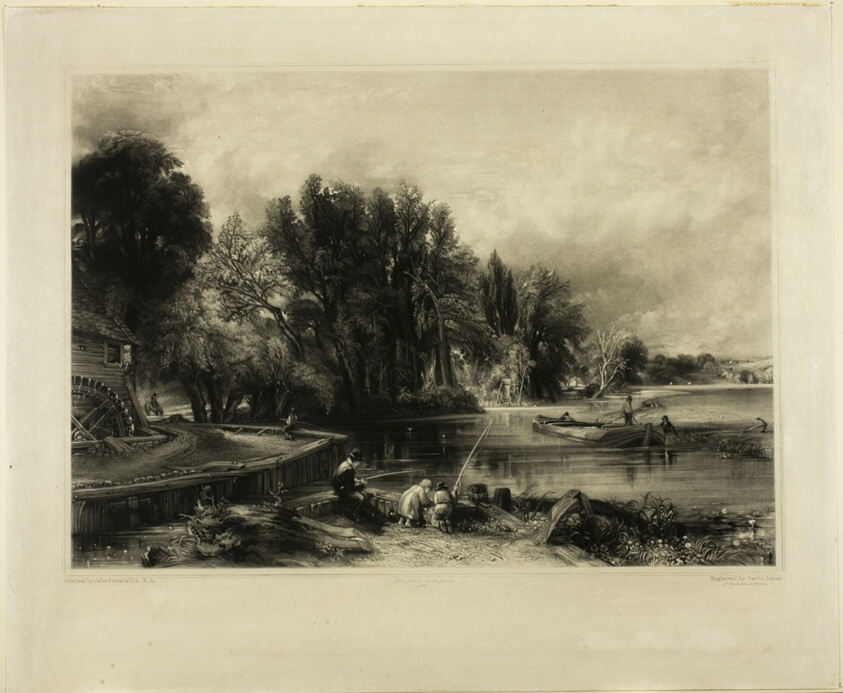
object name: Print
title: The Young Waltonians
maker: David Lucas (English, 1802-1881); after John Constable (English, 1776-1837)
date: 1840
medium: Mezzotint on paper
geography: England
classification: mezzotint; print; prints and drawing